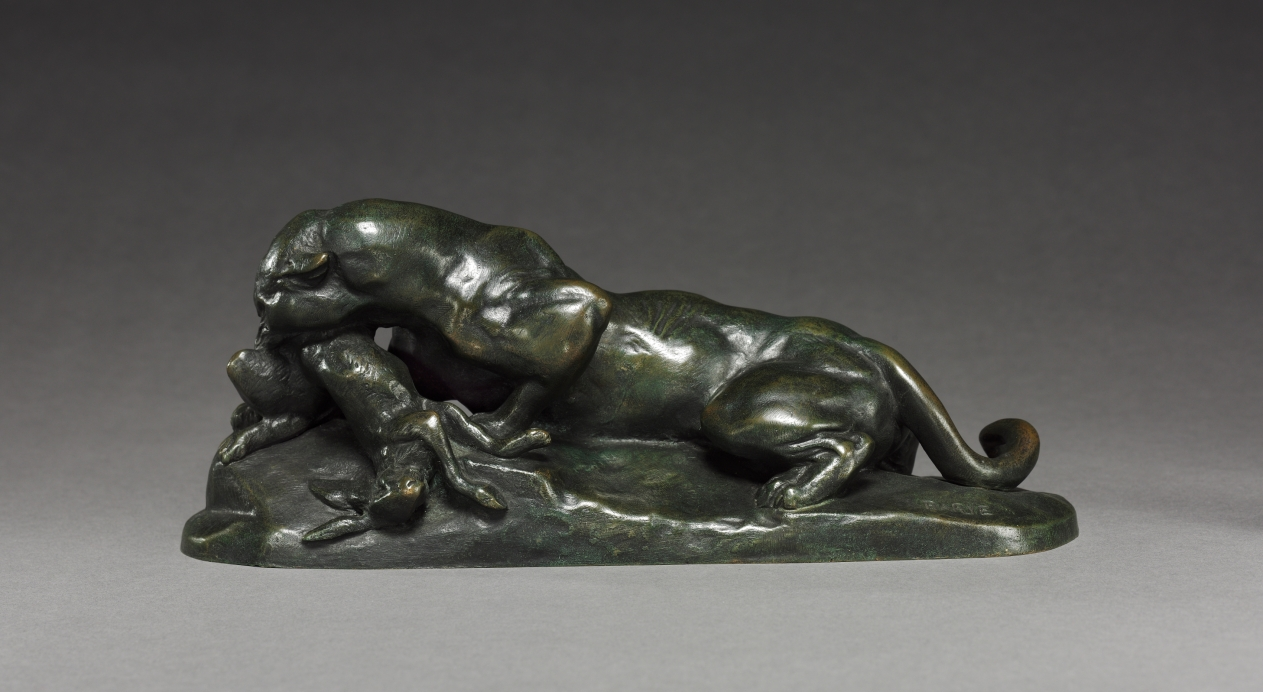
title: Jaguar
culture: France, 19th century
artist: Antoine-Louis Barye (French, 1796–1875)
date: c. 1850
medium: bronze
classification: Sculpture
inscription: On base, back of left hind leg: (L?). Barye"